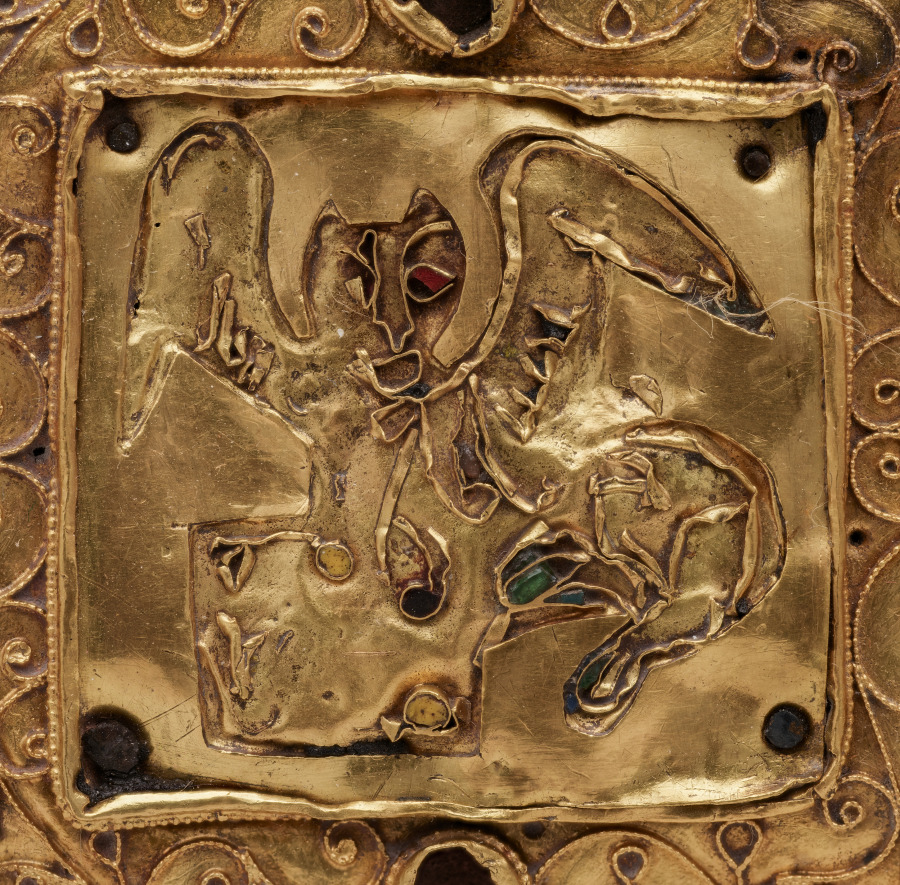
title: Ceremonial Cross of Countess Gertrude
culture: Germany, Lower Saxony?, 11th century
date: 1038 or shortly after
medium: gold: worked in repoussé; cloisonné enamel, intaglio gems, pearls, wood core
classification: Metalwork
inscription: translation of inscription on back: For the Relics of the Holy Apostle Peter and the Holy Virgin Liutrudis, Countess Gertrude Ordered this made.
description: This precious gold cross was commissioned by Countess Gertrude (died 1077) and given to the church of Saint Blaise following the death of her husband, Count Liudolf of Brunswick (died 1038). The cross was intended to be carried in liturgical processions or to be placed on a church altar. The inclusion of relics within the crosses endowed them with an additional role as devotional objects. At the center of the four cross arms, fine but much damaged cloisonné enamel plaques represent the symbols of the four Evangelists--an eagle for Saint John (above); a lion for Saint Mark (on the left); an ox for Saint Luke (on the right); and an angel for Saint Matthew (below). Pearls and precious and semiprecious stones are set within an intricate network of gold filigree while a large sapphire, inscribed in a circle and likewise surrounded by pearls and precious stones, is placed at the crossing.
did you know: Countess Gertrude's name appears on the back of the cross at the bottom.